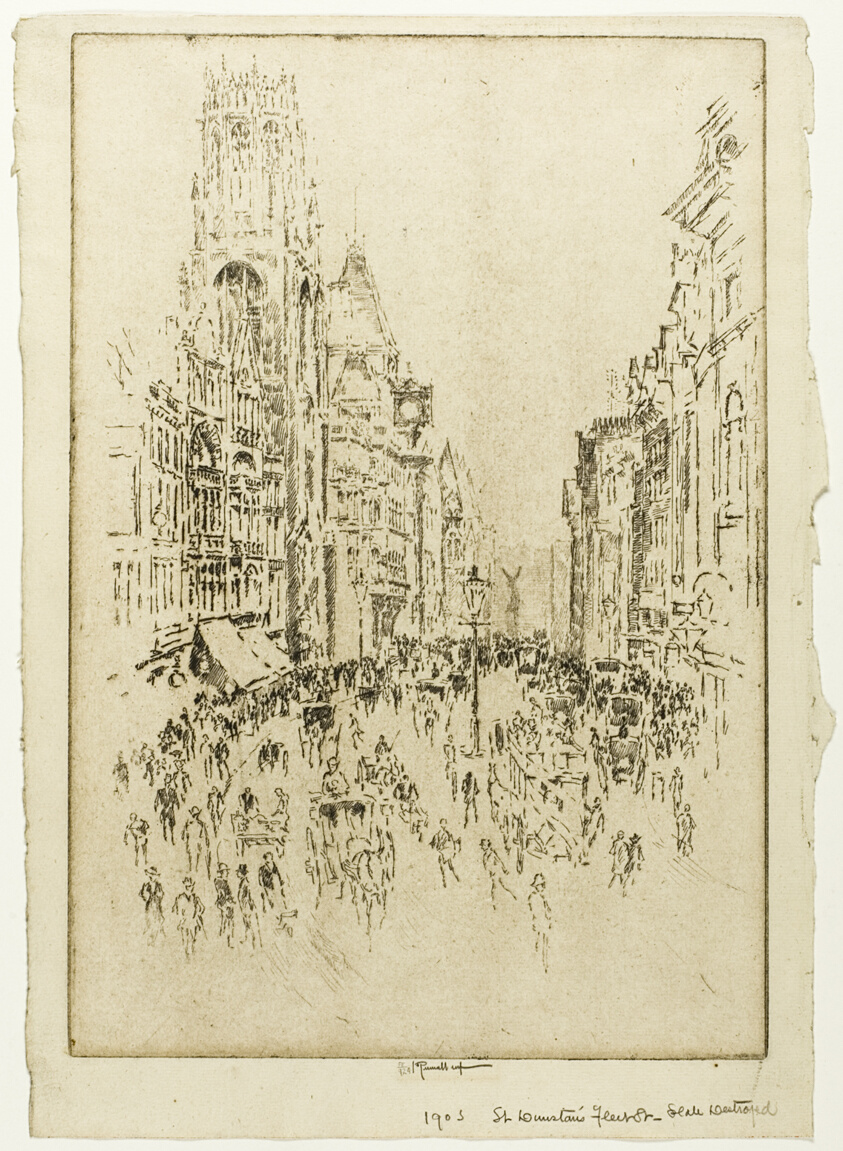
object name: Print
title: St. Dunstan's, Fleet Street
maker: Joseph Pennell (American, 1857-1926)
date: 1903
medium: Etching on ivory laid paper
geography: United States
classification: etching; print; prints and drawing